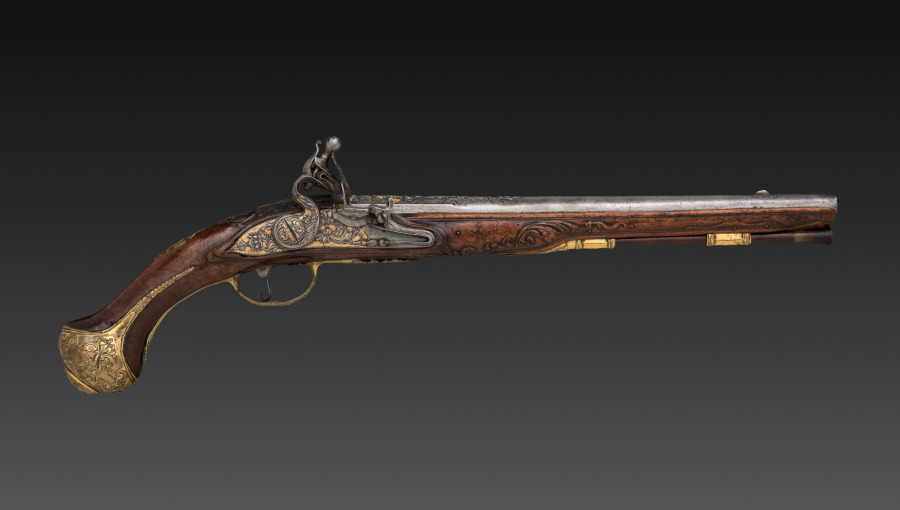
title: Flintlock Pistol (1 of 2)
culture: Franco-Flemish, Liège, early 18th century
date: early 1700s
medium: steel with gold inlay, gilt-brass mounts; walnut burl stock; chiseled high-relief decoration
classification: Arms and Armor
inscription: on barrel: G. MASSIN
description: The exquisite ornament along the breech of the barrel is chiseled and engraved. The barrel of this pistol is signed g. massin, the name of a gunsmith working in eastern France or French-speaking Flanders, possibly the city of Liège.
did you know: The flintlock ignition system was developed in the 1600s and remained the dominant system until the early 1800s.